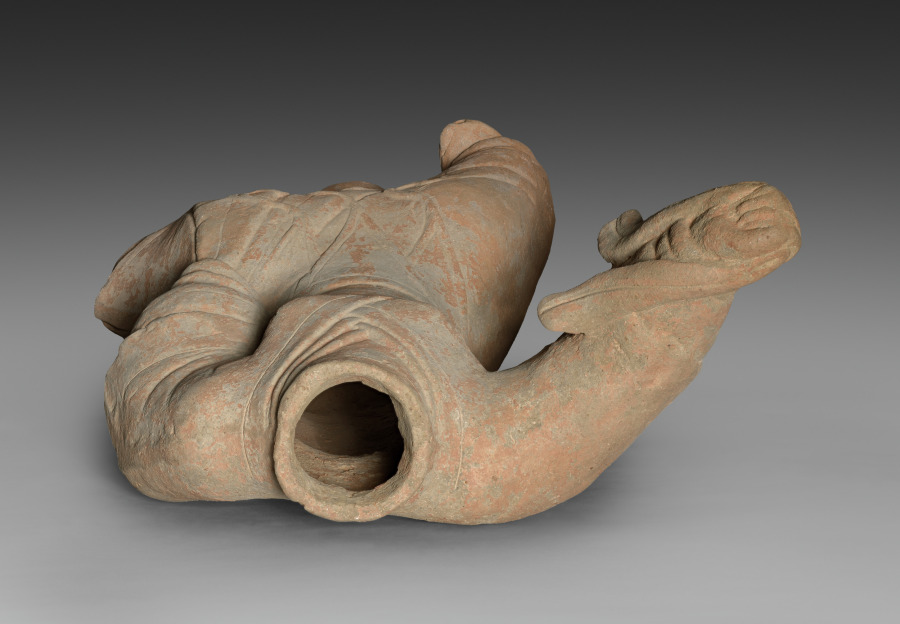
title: Female Figure of a Court Entertainer Dancing (Body)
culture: China, Sichuan province, Eastern Han dynasty (25–220 CE)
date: 100s CE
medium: Pottery with traces of color pigment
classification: Ceramic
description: During the Han era, tombs of the elite were provided with sculpted renditions of their earthly entourage, such as guardians or musicians, to signify their status in the afterlife. The female dancer with elaborate hairdo held by flower ornaments raises one arm holding her wide sleeve with one hand, while the other lifts her robe to reveal what appears to be a drum underneath her garment, her face smiling, all in a gesture of an entertainer.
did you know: The dancer lifts her robe to reveal what appears to be a drum underneath her garment.